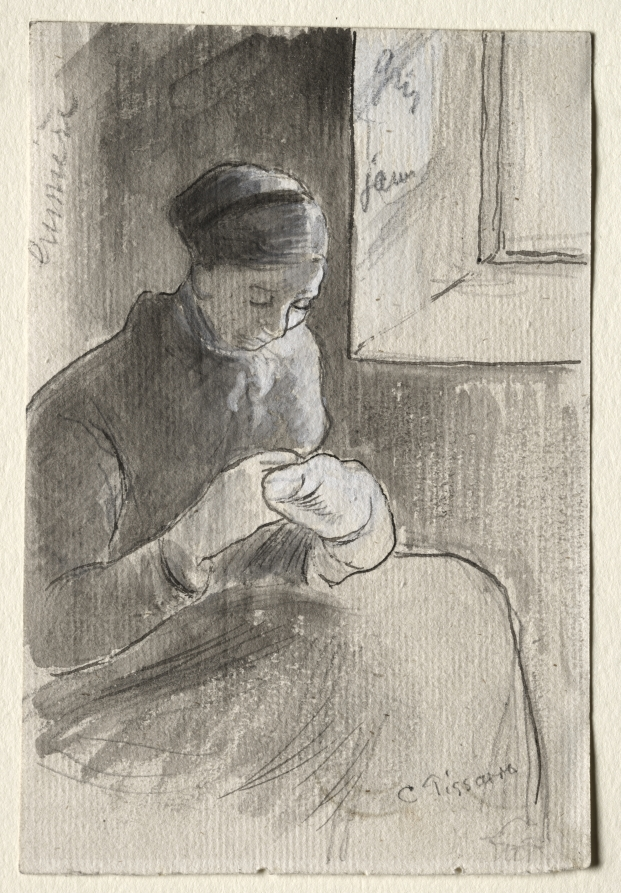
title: The Mender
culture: France, 19th century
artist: Camille Pissarro (French, 1830–1903)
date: c. 1881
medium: pen and black ink and gray wash over graphite heightened with white gouache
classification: Drawing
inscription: signed, lower right, in graphite: C Pissarro; by artist, upper left, in graphite: lumière; by artist, upper right, in graphite: gris; by artist, upper right, in graphite: jaun; VERSO, by artist?, upper right, in graphite: CP81 / a - [illegible][crossed out]; lower left, in graphite: 21952; lower right, in graphite: Nº 13 [underlined]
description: Camille Pissarro used the French countryside and its inhabitants as the subject of his art throughout his career. He frequently depicted women sewing, often outdoors or seated beside a window, as seen in this drawing. He indicated the effects of natural light illuminating his subject with the notation "lumière" at the left margin of the drawing.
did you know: At the time this drawing was made, Camille Pissarro lived in the small village of Pontoise. He remained there for over a decade to immerse himself in the type of rural life that he depicted in his art.